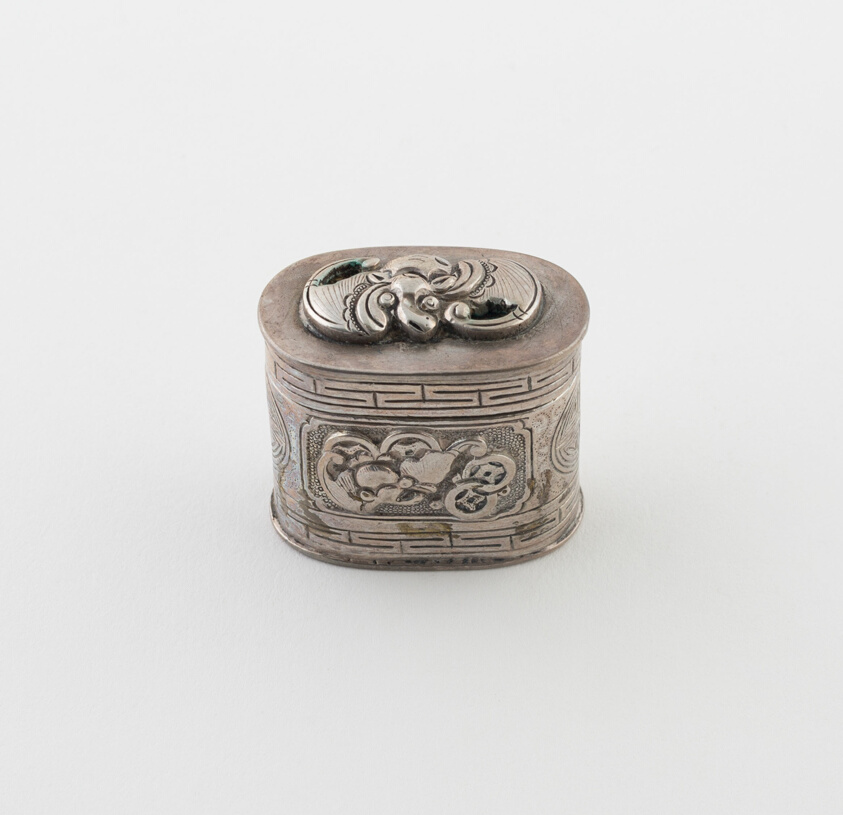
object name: Metalwork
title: Opium Box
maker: China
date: c. 1821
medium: Silver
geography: China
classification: container for personal use; box; european decorative arts; metalwork; silver; decorative object/ornament